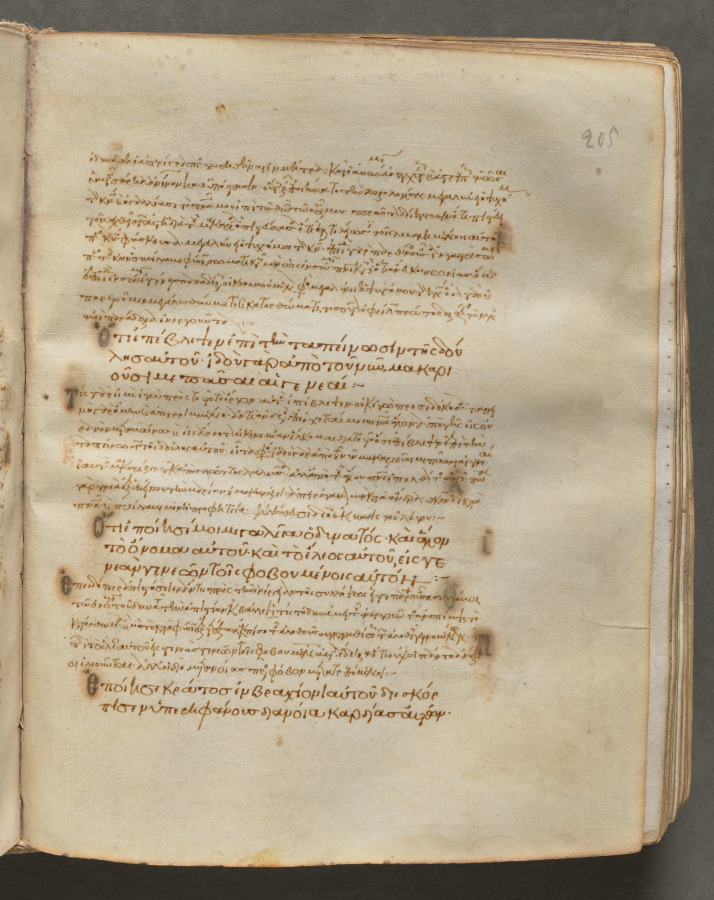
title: Text, folio 205 (recto), from a Gospel Book with Commentaries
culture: Byzantium, Constantinople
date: c. 1000–1100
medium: ink, tempera, and gold on vellum; leather binding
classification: Bound Volume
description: Each of the four gospels in this book opens on a page with brilliantly illuminated borders depicting the author of the text as well as birds-principally peacocks, symbols of the immortality of the soul-and fountains, representing the fountain of life and the salvation of the soul. This volume consists of 428 leaves with texts in Greek. Its level of sophistication suggests that it was probably written and decorated in a monastery in Constantinople.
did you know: Gospel Books were carried in procession through Byzantine churches.